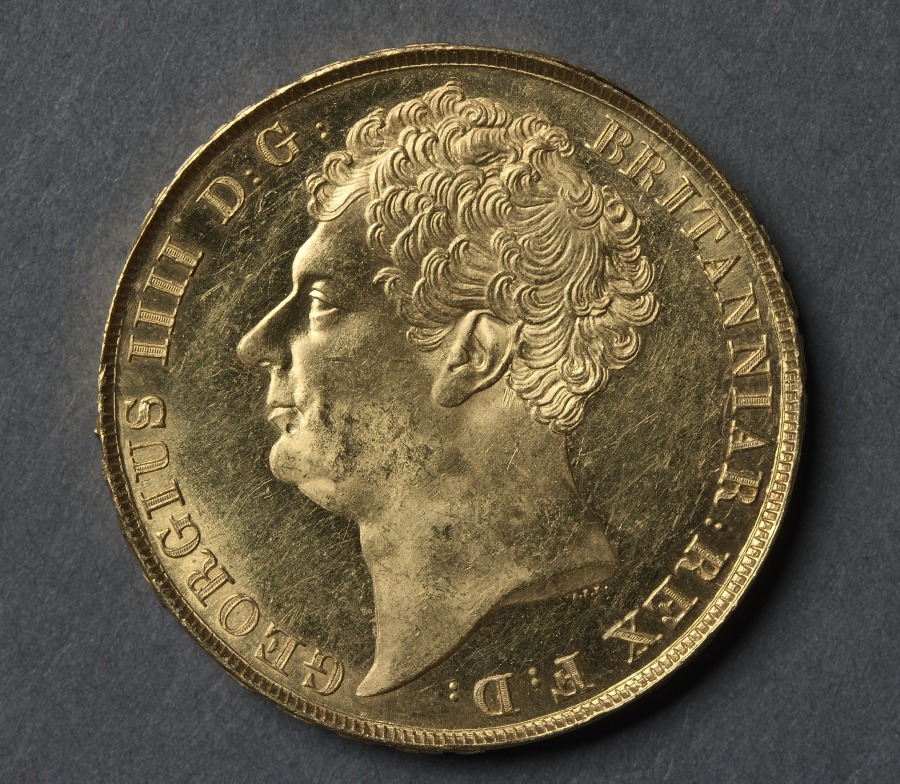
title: Two Pound Piece: George IV (obverse); St. George and the Dragon (reverse)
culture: England, George IV, 1820-1830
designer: after Benedetto Pistrucci (Italian, 1784–1855)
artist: after a design by Francis Legatt Chantrey (British, 1781–1841)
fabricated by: Jean Baptiste Merlen (French, 1769–1850)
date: 1823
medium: gold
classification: Coins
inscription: BRITANNIAR: REX F: D: GEORGIUS IIII D: G:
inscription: 1895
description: During the reign of King George IV, two-pound pieces were struck for circulation in 1823 only. Pattern pieces appeared in 1824, 1825, and 1826. The king was so disgusted with the caricature of a portrait that Pistrucci placed on the first coins of the reign that the artist was ordered to model a new obverse from a bust by the sculptor Sir Francis Chantrey (1781–1841). Pistrucci refused; it was beneath his dignity to copy the work of another artist. The work was therefore carried out by J. B. Merlen, assistant engraver at the Royal Mint.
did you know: This is the only modern British coin on which the initials of the Master of the Mint, William Wellesley Pole, appear, on the reverse below the broken lance.